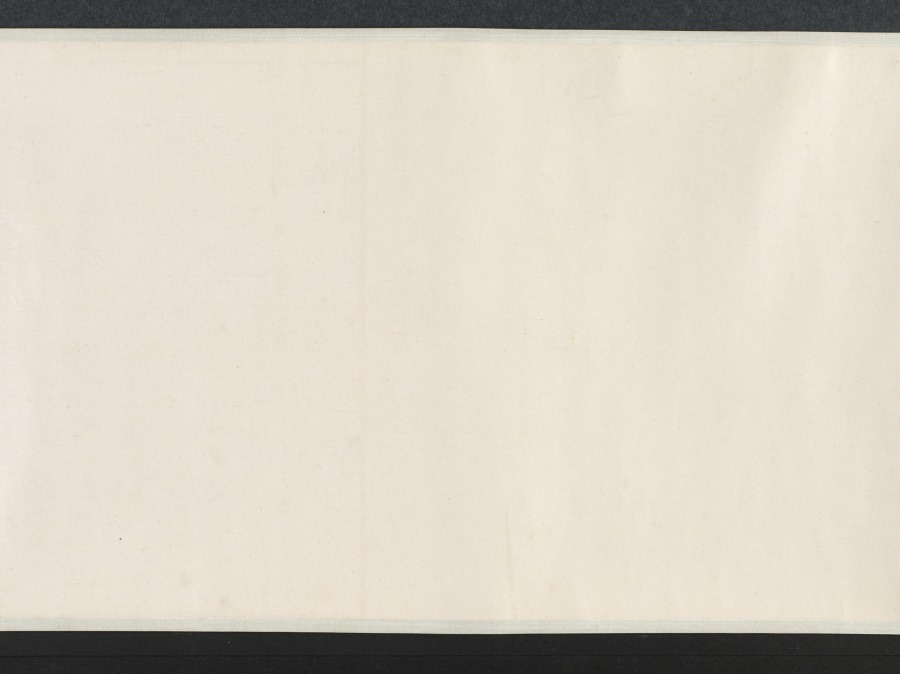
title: Nine Songs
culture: China, Yuan dynasty (1271-1368)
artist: Zhang Wo (Chinese, active c.1336–after 1364)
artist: Chu Huan (Chinese, active 1361)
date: 1361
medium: handscroll; ink on paper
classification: Painting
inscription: 7 colophons and 47 seals: 1 colophon, dated 1361, and 28 seals of Chu Huan 褚奐 (active c. 1361); 1 colophon, dated 1785, and 1 seal of Lu Shihua 陸時化 (1714-1779); 2 seals of Lu Yü-ch'ing (18th c.); 1 colophon, dated 1935, of Ye Gongchuo 葉恭綽 (1881-1968); 1 colophon, dated 1935, of Wu Hufan 吳湖帆(1894–1968); 1 colophon, dated 1938, and 1 seal of Wang Tongyu 王同愈 (1856-1941); 1 colophon, dated 1941, of Wu Huayuan 吳華源 (1893-1972); 1 colophon, dated 1942, and 9 seals of Xu Bangda 徐邦達 (1911–2012); 1 colophon, dated 1942, of Lang Jingshan 郎靜山 (1892-1995); 1 colophon, dated 1944, of Tang Yun 唐雲 (1910-1993); 6 seals of Wang Jiqian [C.C. Wang] 王季遷 (1907–2003).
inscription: Text of The Nine Songs written by Chu Huan at the end of each section.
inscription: 右離騷九歌圖，宋龍溟居士李公本，淮南張渥叔厚所畫妙絕當世。家藏請予書其辭目識于左。至正二十一年辛醜三月旦河南褚奐記。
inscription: Colophon by Lu Shihua 陸時化 (1714–1789): This scroll is fortunate to have been handed down from collections of the right people. Now, after 500 years, its condition is as good as when it was painted. I acquired this from Mr. Shen Guiyu [1673-1769], the President of the Board of Rites. The label is in his handwriting when he was 95 years old. I submit that Chu Huan (t. Shiwen) of the Yuan Dynasty was a native of Qiantang. His "seal" and li writings are in the style of Wu Rui. For example, in [Chu Kuei's] Ming ji lu [A list of masterpieces] is recorded the stele commemorating the restoration of the prefectural school of Kun-shan, the text of which was composed by Yang Weizhen in the twenty-first year of Zhizheng [1361]; and the calligraphy as well as the title in li style was by Chu Huan, who was at that time an assistant judge of the prefecture of Haining in the circuit of Hangzhou. Zhang Wo's zi is Shuhou (叔厚). His literary name is Zhen Qisheng (贞期生). According to [Gu Ying's] Yu shan cao tang ya jii, he liked to paint in the bai-miao or the "pure delineation" style after the method of Li Longmian [Li Gonglin 李公麟], which finds no peer among the ancient masters. This is agreed upon [by Pei Ch'iung] in his Qing jiang zhi who praised [Zhang Wo] as being quite learned and well-versed in many branches of the arts, especially figure painting. Recorded by Lu Shihua [The mountain dweller], listening to the pine, in the twelfth month of the yisi year [1785].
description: Painted in the baimiao, or fine-line drawing style, this ancient work demonstrates the literati’s use of abstract calligraphic brushwork for self-expression. The subject of the “Nine Songs”—songs associated with shamanistic rituals in the ancient Chu kingdom—had traditionally provided artists with myths and legends that they could explore and reinterpret in their own works.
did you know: Divided into eleven sections, the scroll contains illustrations by painter Zhang Wu followed by a transcription of the relevant verse by calligrapher Chu Huan.